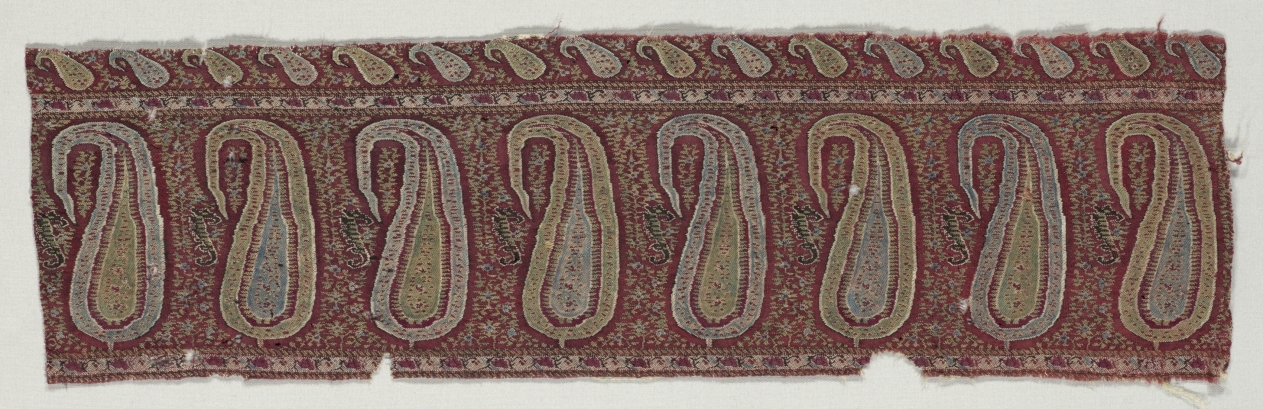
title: Border of a Shawl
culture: India, Punjab, 19th century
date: 1800s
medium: tapestry twill; wool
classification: Textile